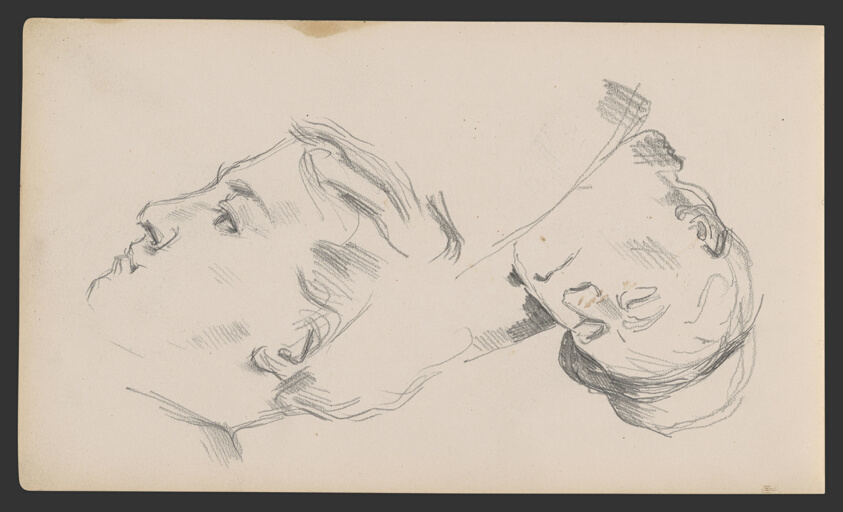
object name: Drawing and Watercolor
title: Sketchbook No. 2 (L'Estaque)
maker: Paul Cézanne; French, 1839-1906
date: 1875–86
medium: Graphite and pen and ink drawings on paper, bound into a book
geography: France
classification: sketchbook; graphite; prints and drawing; paper